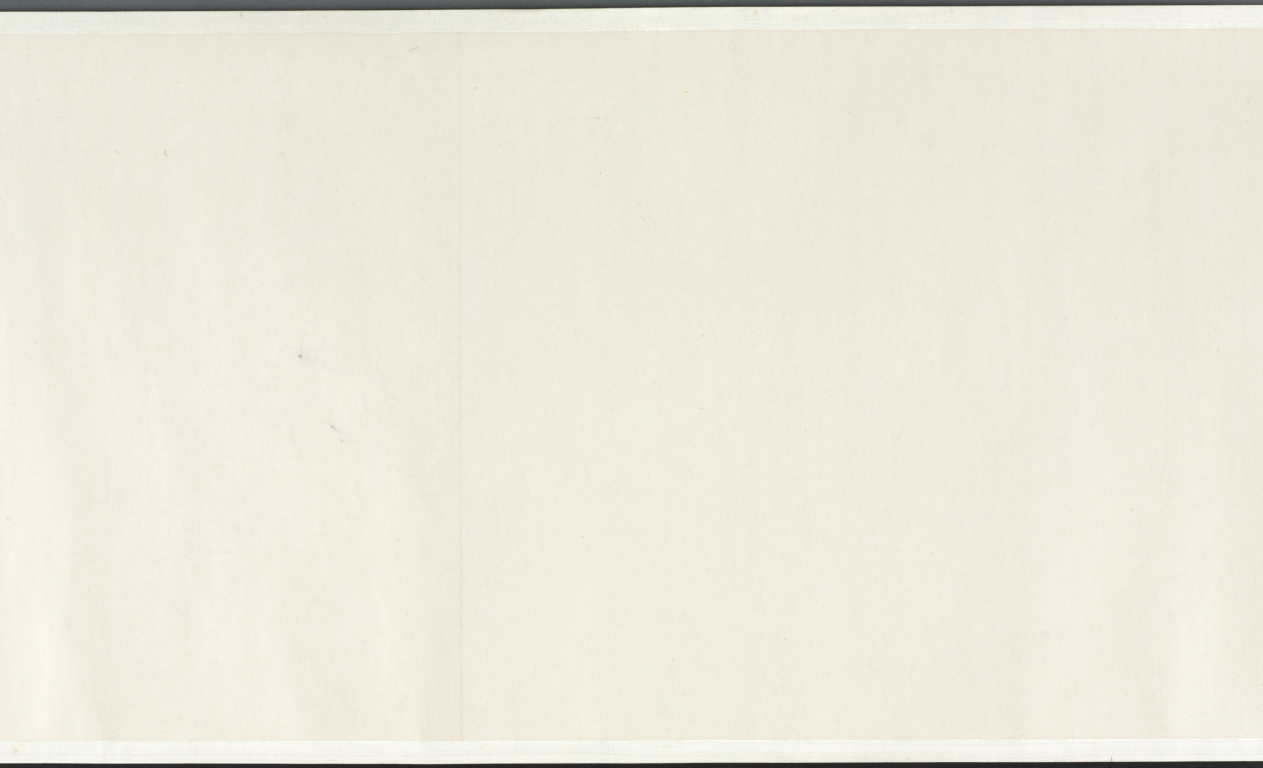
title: Buddha's Conversion of Five Bhiksu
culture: China, Yuan dynasty (1271–1368)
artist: Li Sheng (Chinese, active c. 1324–after 1375)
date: mid-1300s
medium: handscroll; ink on paper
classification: Painting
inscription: 紫篔生李升識 [印] 李氏子雲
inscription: 4 colophons and 12 additional seals: The "Heart" Sutra (Maha Prajnaparamita) text written by Wu Yuqing 吳餘慶 (active early 1400s); 2 seals of Xu Qianxue 徐乾學 (1631–1694); 3 colophons, one dated 1929 and two dated 1936, and 9 seals of Wu Hufan 吳湖帆 (1894–1968); 1 colophon, dated 1932, of Chen Dingshan; 1 seal unidentified.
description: This episode stems from the life of the historical Buddha, who, after his enlightenment, was initially hesitant about preaching his own doctrine. After much personal deliberation and prodding by deities, he finally relented. The first converts were the five guards who served him when he was still a prince. For Li Sheng, this is the pretext of the painting, which moves from the interaction of the bhiksu with the Buddha to a broader awareness of the vast surroundings of the scene.